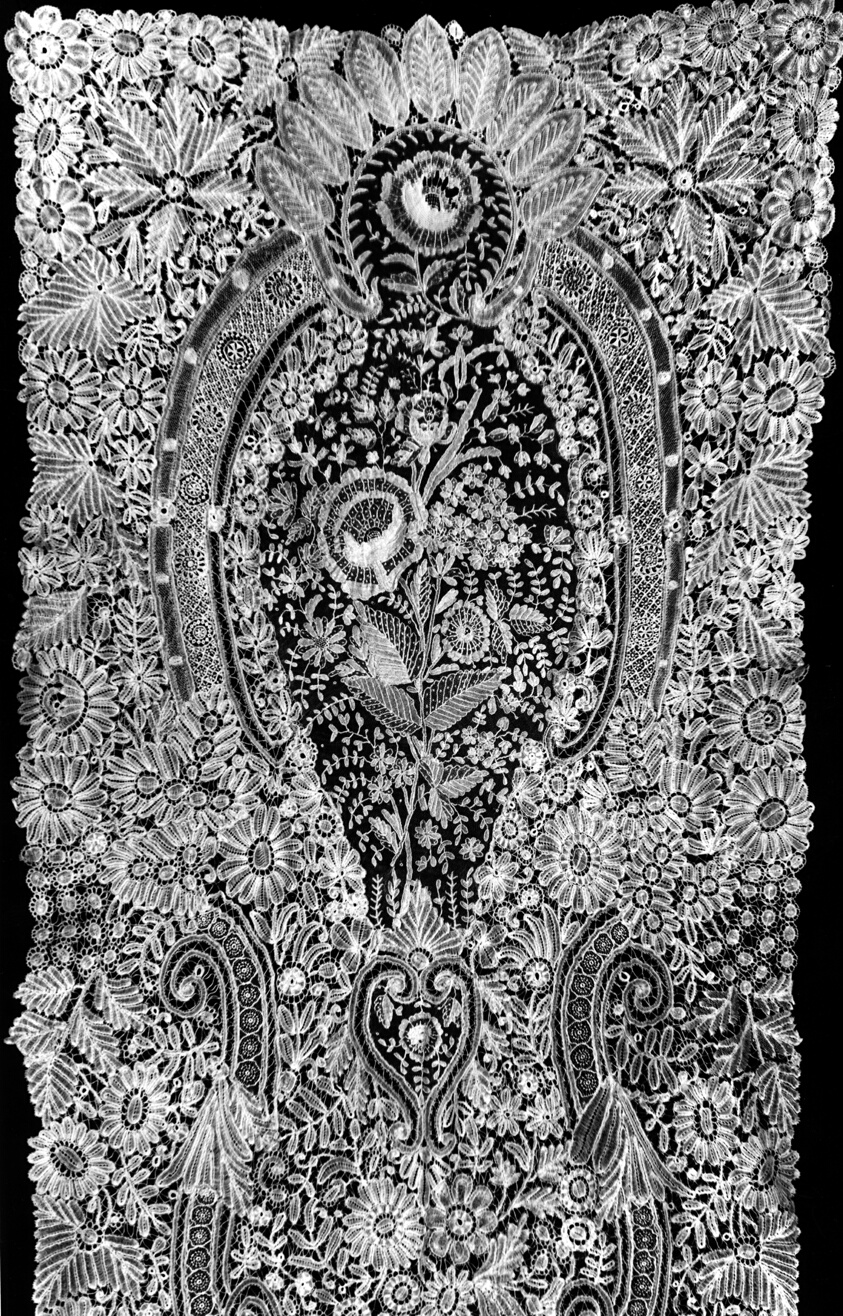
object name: Textile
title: Stole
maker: Belgium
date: 1875/1900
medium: Cotton, mixed lace: bobbin lace of a type known as "Duchesse" with insets of needle lace of a type known as "Point de Gaze"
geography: Belgium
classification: textile; lace - mixed